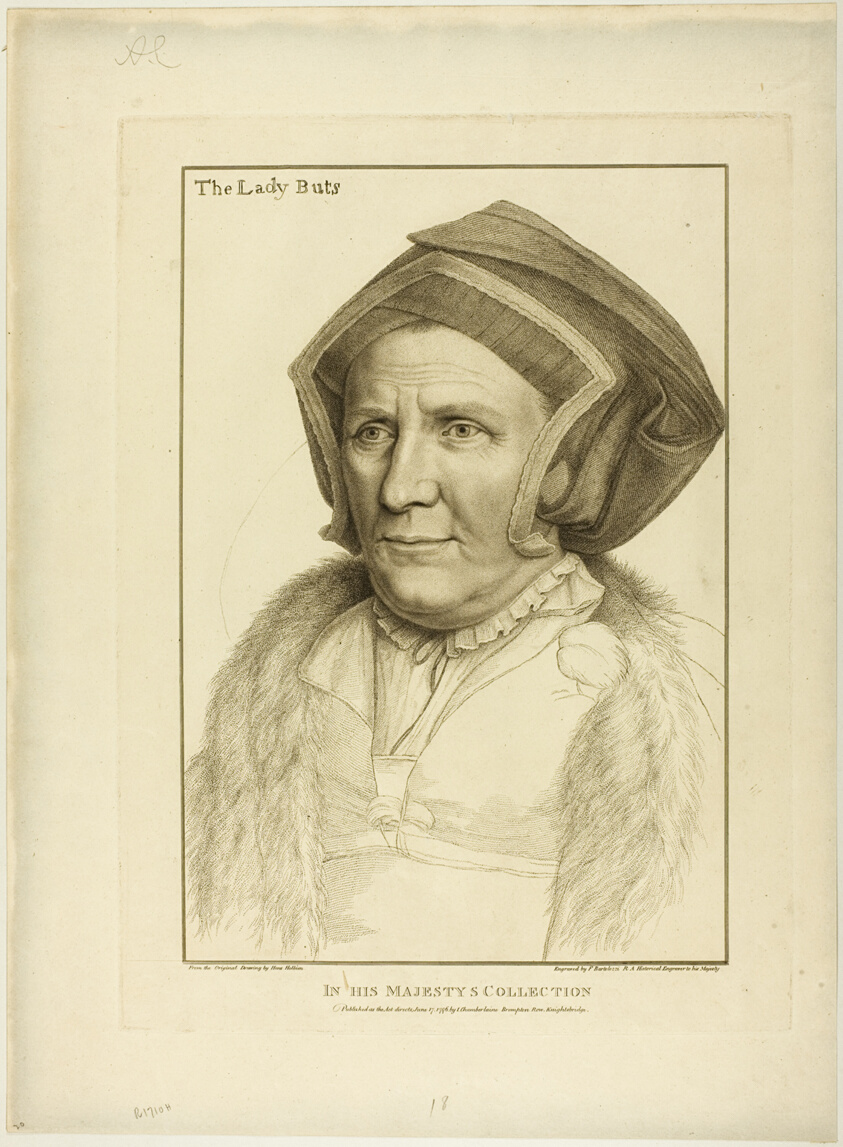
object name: Print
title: Lady Buts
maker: Francesco Bartolozzi (Italian, 1727-1815); after Hans Holbein the younger (German, 1497-1543)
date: June 17, 1796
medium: Stipple engraving on cream wove paper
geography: Italy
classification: engraving; print; prints and drawing